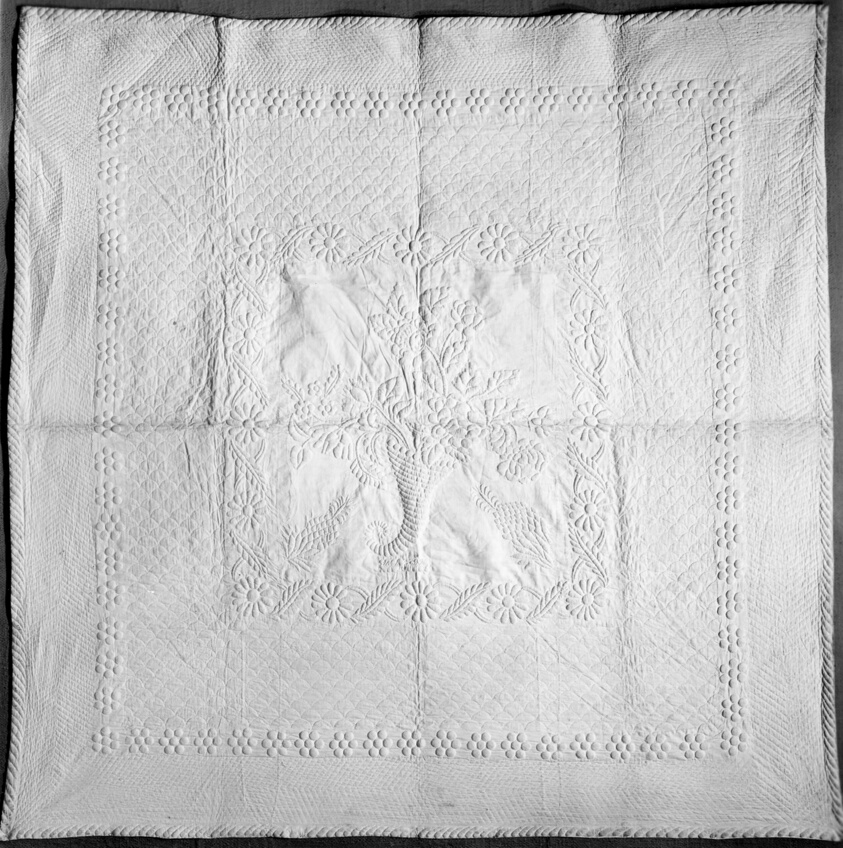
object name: Textile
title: Bedcover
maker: Ursula Whittelsey (American, 1796-1875); Saybrook, Conneticut, United States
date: 1819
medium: Cotton, plain weave; quilted and stitched in trapunto technique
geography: United States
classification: textile; needlework - quilt